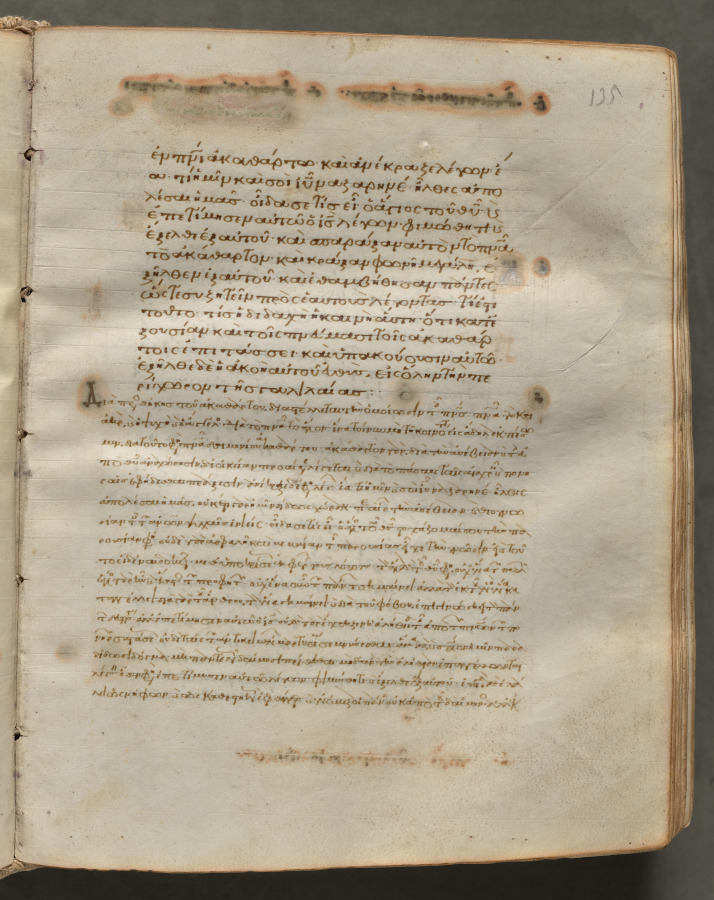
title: Text, folio 135 (recto), from a Gospel Book with Commentaries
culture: Byzantium, Constantinople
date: c. 1000–1100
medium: ink, tempera, and gold on vellum; leather binding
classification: Bound Volume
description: Each of the four gospels in this book opens on a page with brilliantly illuminated borders depicting the author of the text as well as birds-principally peacocks, symbols of the immortality of the soul-and fountains, representing the fountain of life and the salvation of the soul. This volume consists of 428 leaves with texts in Greek. Its level of sophistication suggests that it was probably written and decorated in a monastery in Constantinople.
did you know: Gospel Books were carried in procession through Byzantine churches.